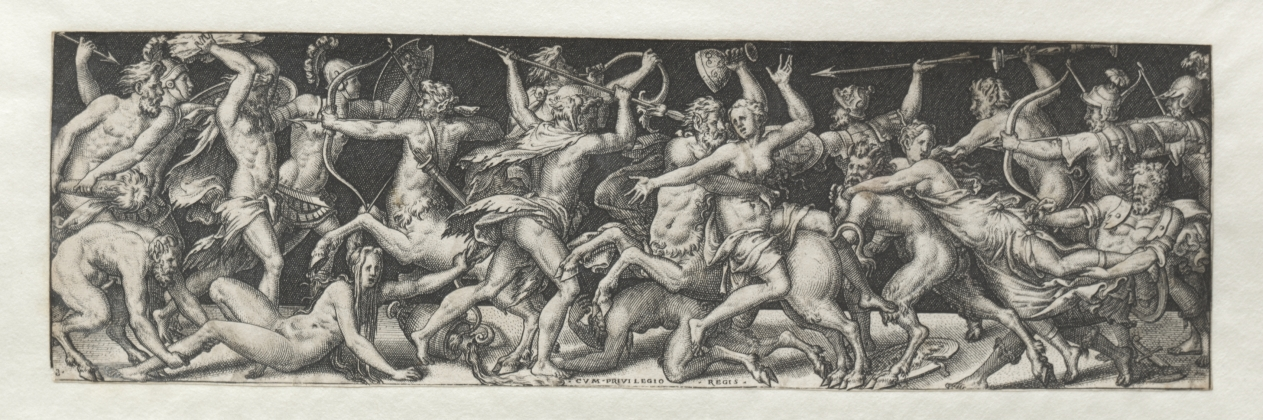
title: Combats and Triumphs No. 8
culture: France, 16th century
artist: Etienne Delaune (French, 1518/19-c. 1583)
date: c. 1550–72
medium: engraving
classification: Print